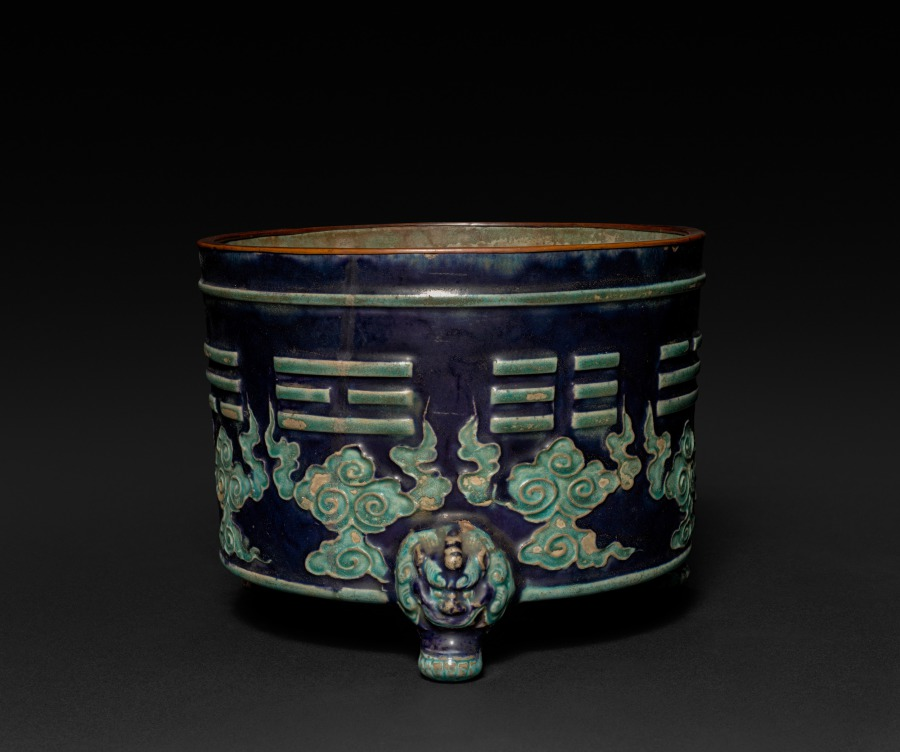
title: Small Jardiniere with Three Legs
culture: China, Jiangxi Province, Ming dynasty (1368–1644)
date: 1368–1644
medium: porcelain, Fahua ware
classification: Ceramic